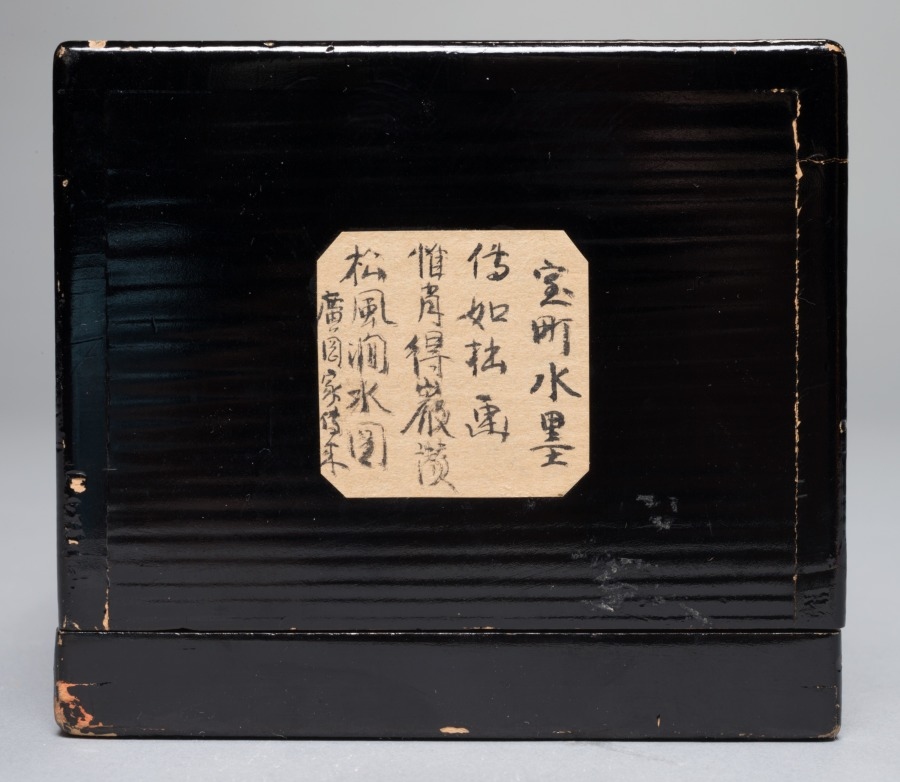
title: Landscape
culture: Japan, possibly Edo period (1615-1868)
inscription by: copy after Ishō Tokugan (Japanese, c. 1359–1437)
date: early 1600s to mid-1800s?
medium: hanging scroll; ink and slight color on paper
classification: Painting